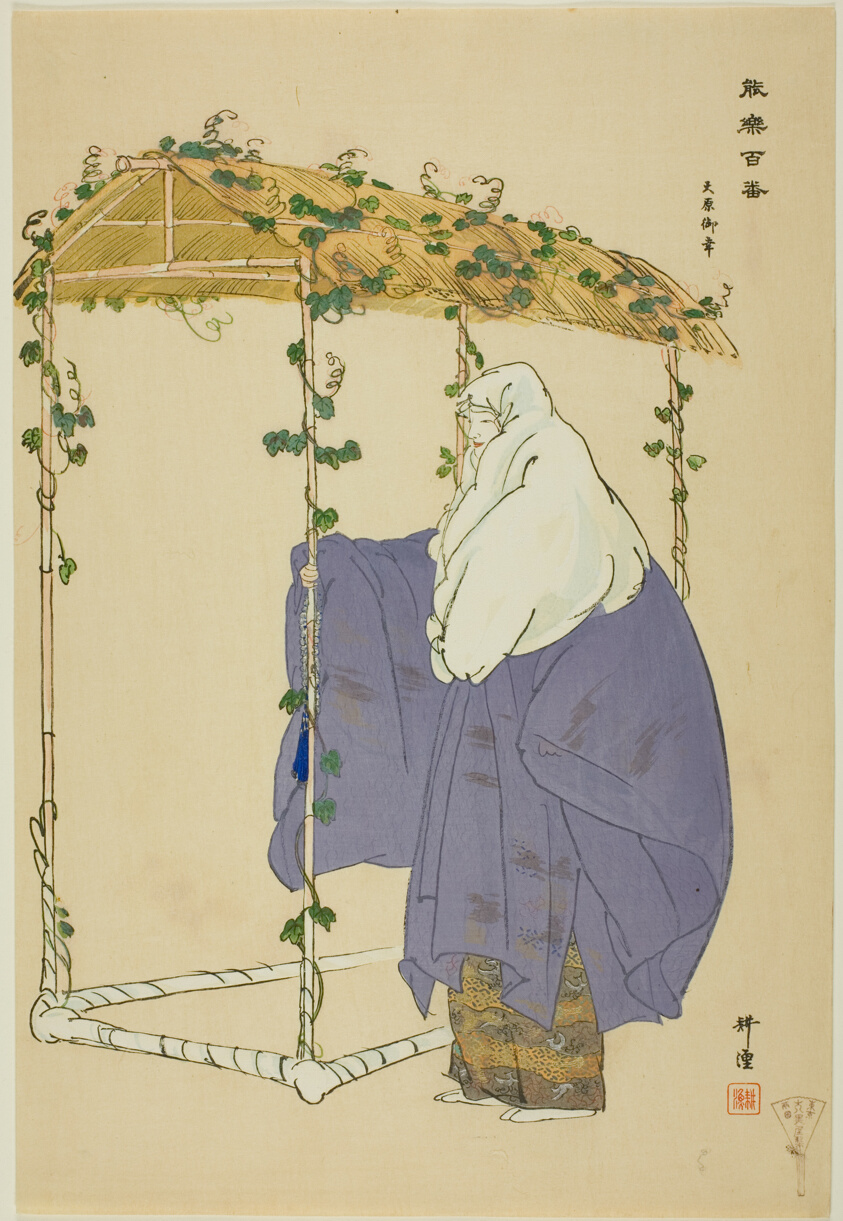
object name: Print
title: Ohara-gokô, from the series "One Hundred No Dramas (Nogaku hyakuban)"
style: Japanese (culture or style)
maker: Tsukioka Kogyo; Japanese, 1869-1927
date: 1898/1903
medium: Color woodblock print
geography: Japan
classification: woodblock print; print; asian art